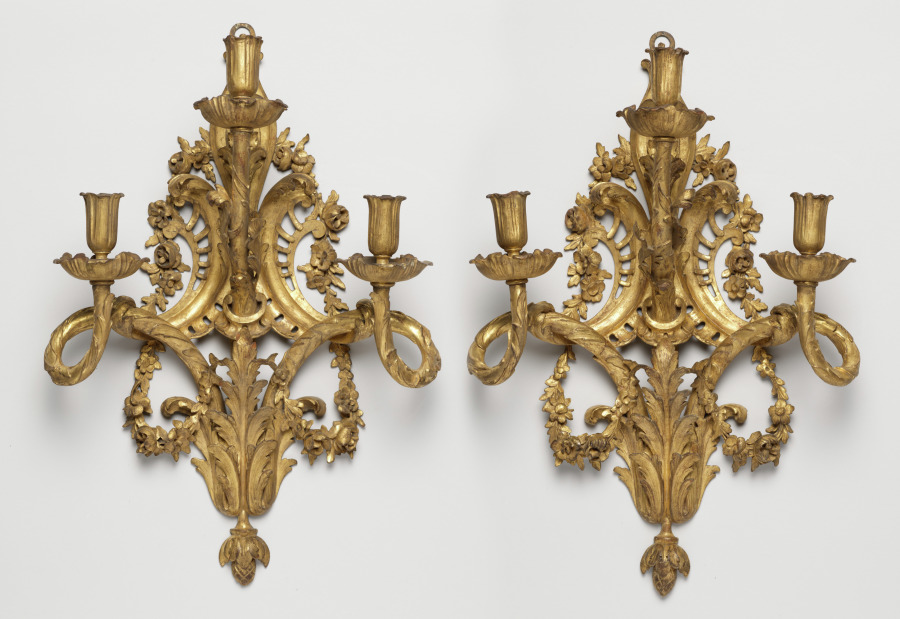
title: Pair of Candle Brackets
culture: France, Transitional Style, Louis XV to Louis XVI, 18th century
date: c. 1765–1775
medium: gilded wood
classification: Furniture and woodwork